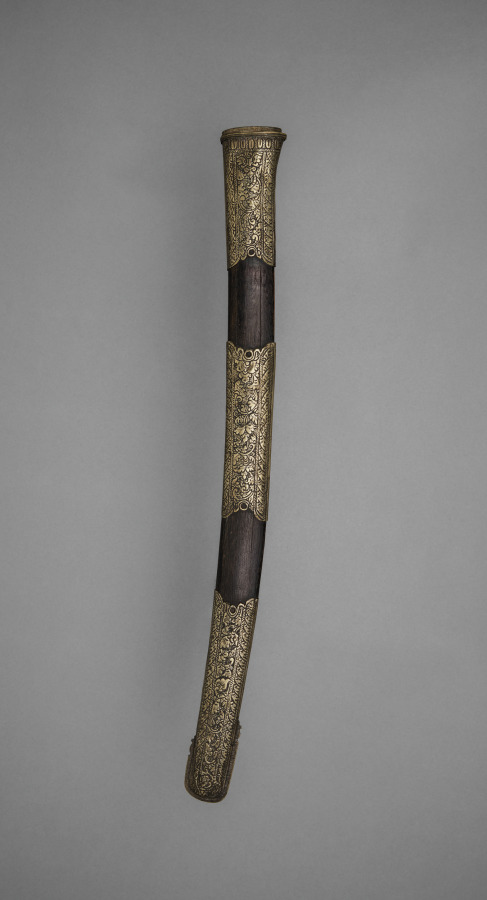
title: Scabbard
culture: Indonesia, Sulawesi (Celebes)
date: before 1916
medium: metal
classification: Arms and Armor